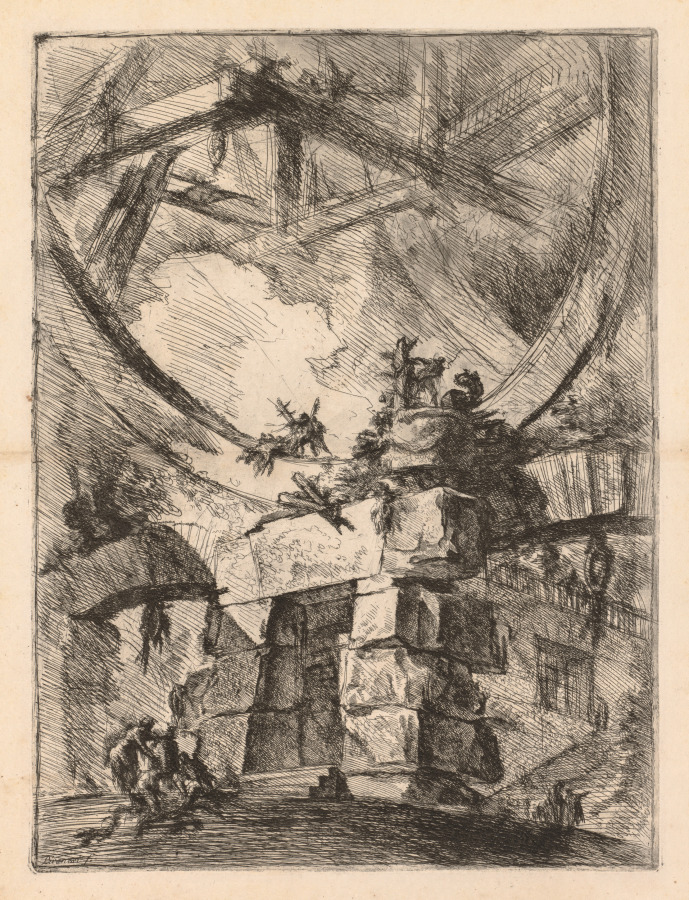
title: The Prisons: A Prison Door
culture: Italy, 18th century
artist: Giovanni Battista Piranesi (Italian, 1720–1778)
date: 1745–1750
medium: etching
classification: Print